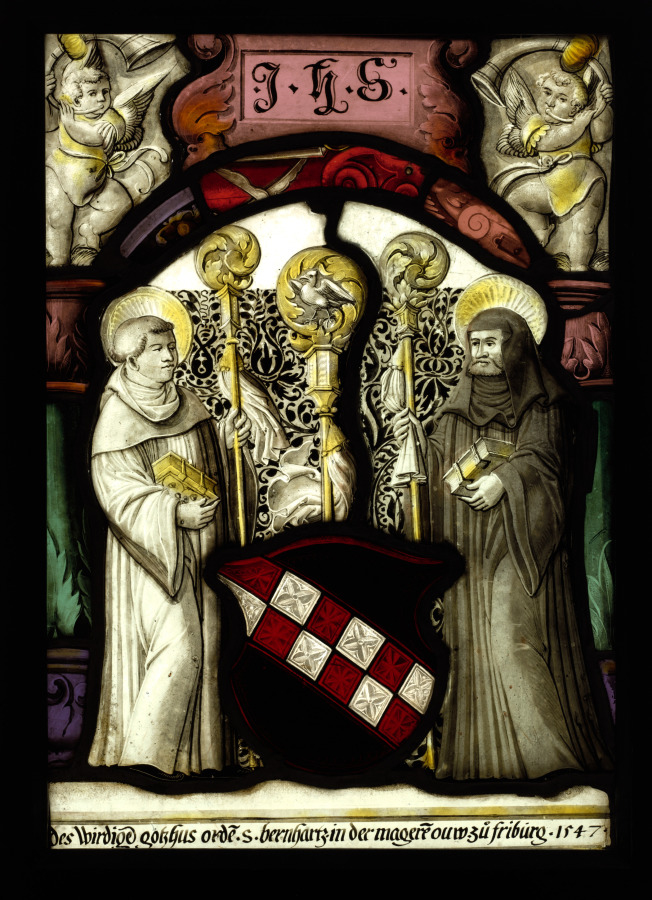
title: Arms of the Cistercian Order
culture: Switzerland, Fribourg, 16th century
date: 1547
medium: pot-metal and white glass, silver stain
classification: Glass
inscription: above: ".I.H.S."; below: inscription in German ".1547."